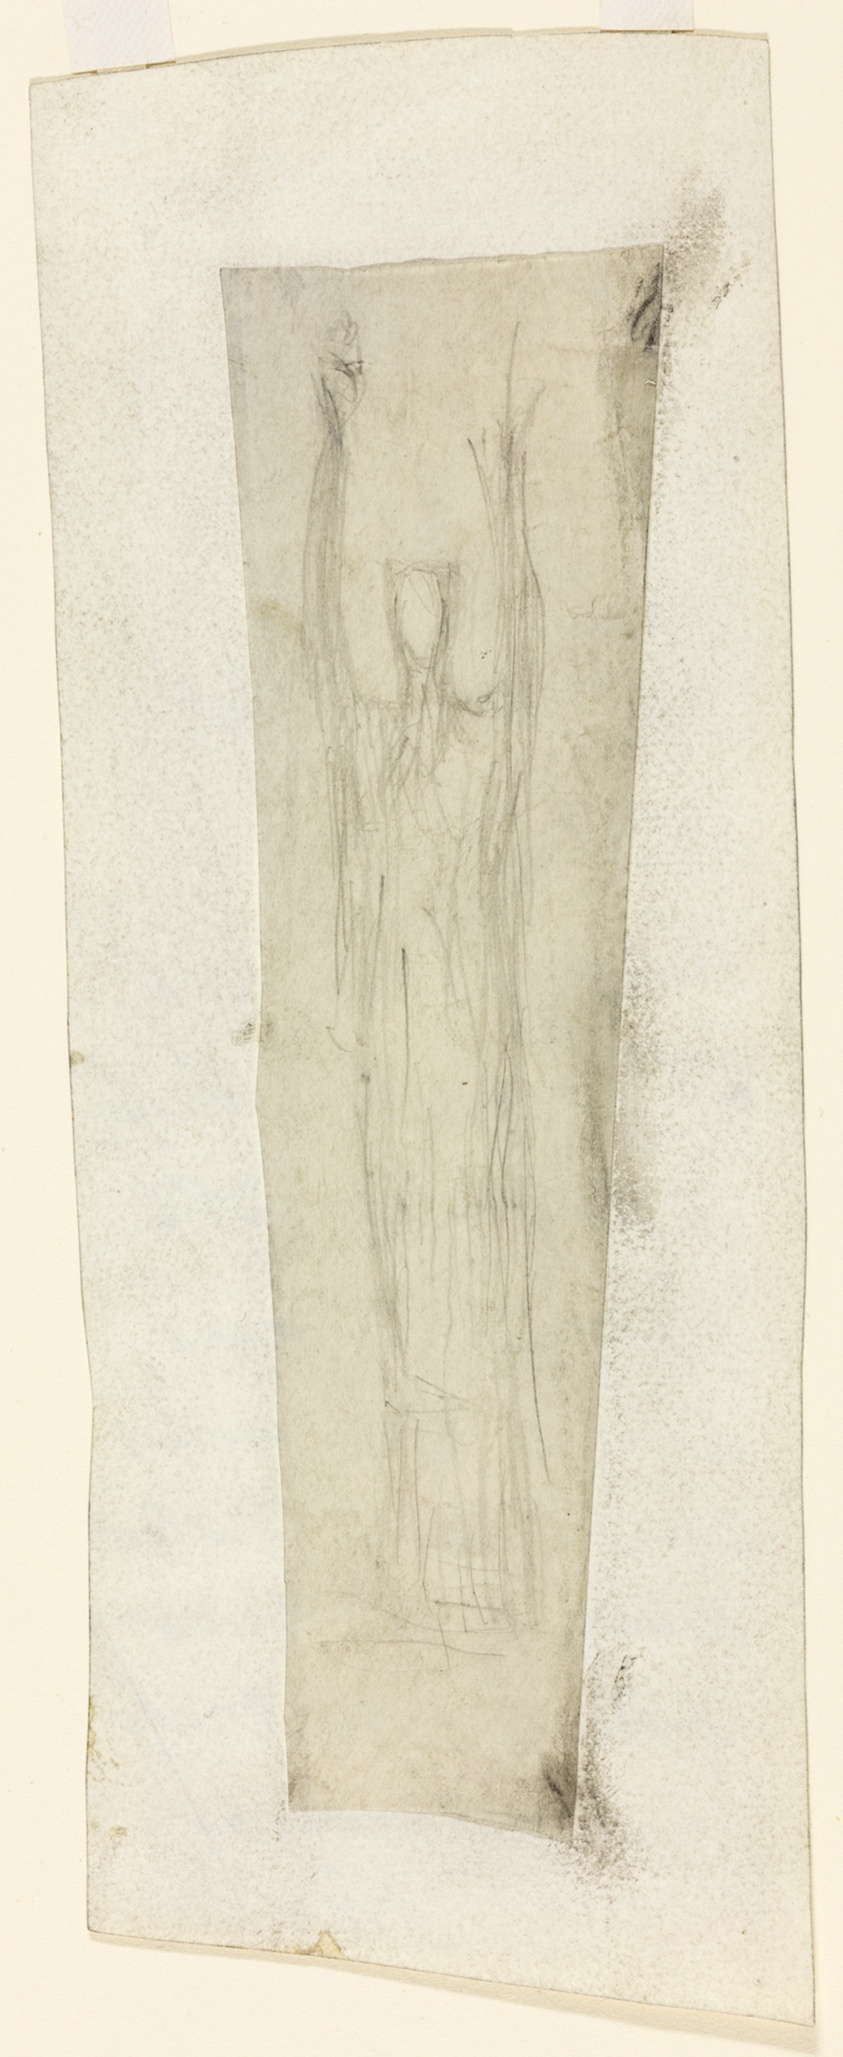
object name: Architectural Drawing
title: Statue of the Republic, Chicago, Illinois, Preliminary Sketch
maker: Augustus Saint-Gaudens (American, 1848–1907)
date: 1891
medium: Graphite on tracing paper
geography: World's Columbian Exposition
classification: architecture; architectural drawing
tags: world's fairs, Chicago World's Fairs